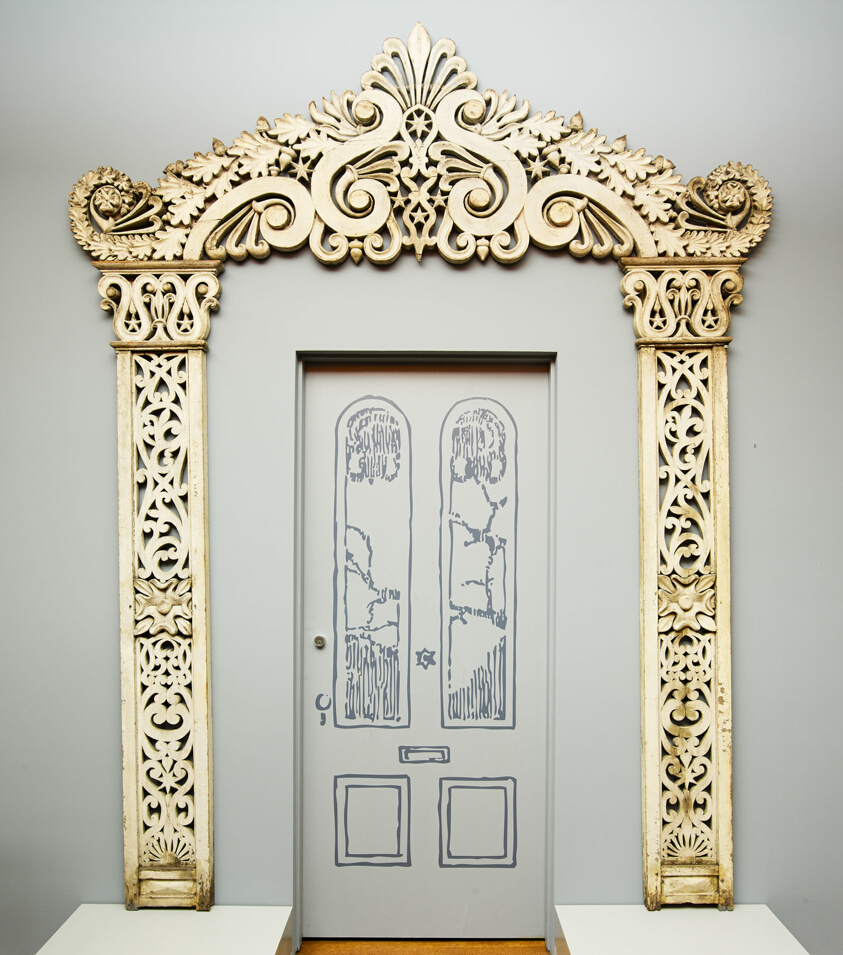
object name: Architectural fragment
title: Doorframe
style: Folk Art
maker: Artist unknown (American, 19th century)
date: 1840–60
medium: White pine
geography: United States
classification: doorframe; architectural fragment; decorative arts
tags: architecture